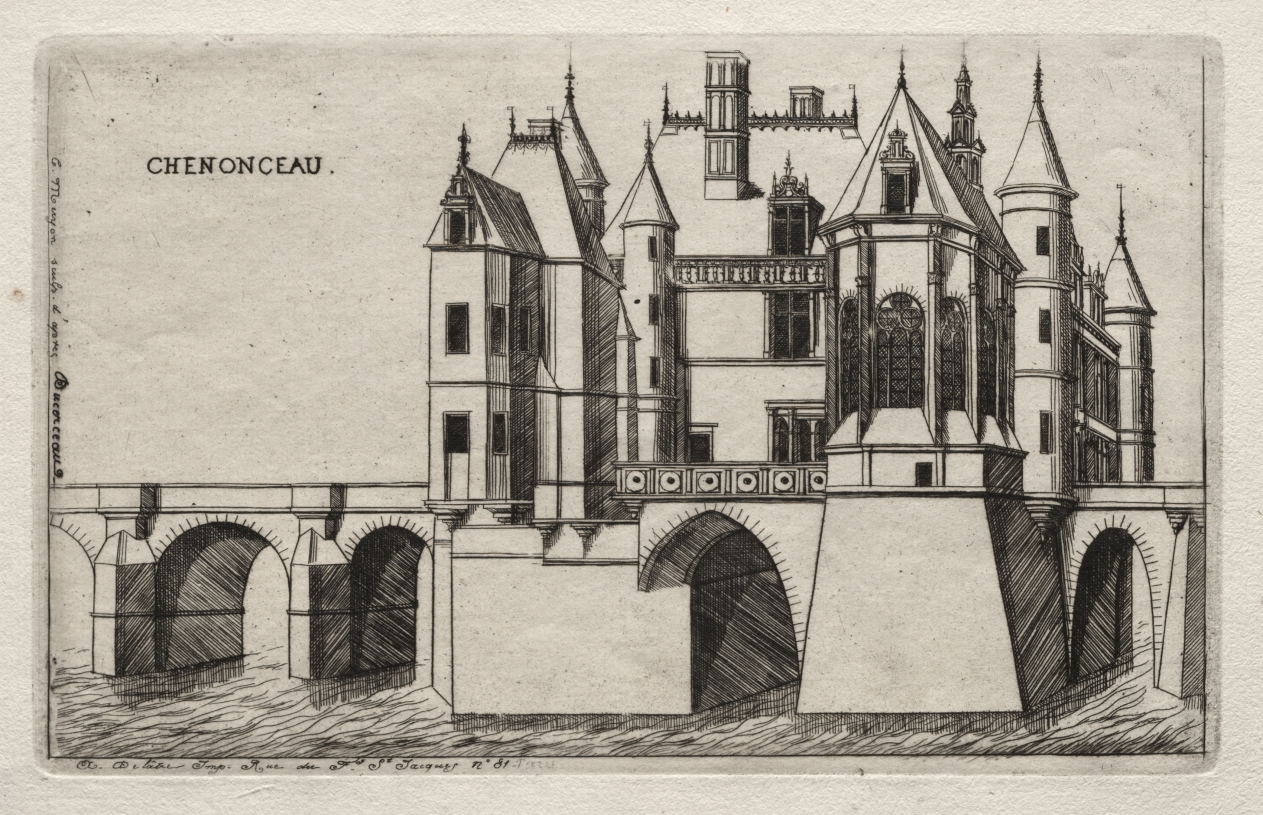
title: The Chateau of Chenonceau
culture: France, 19th century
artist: Charles Meryon (French, 1821–1868)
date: 1856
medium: etching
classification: Print